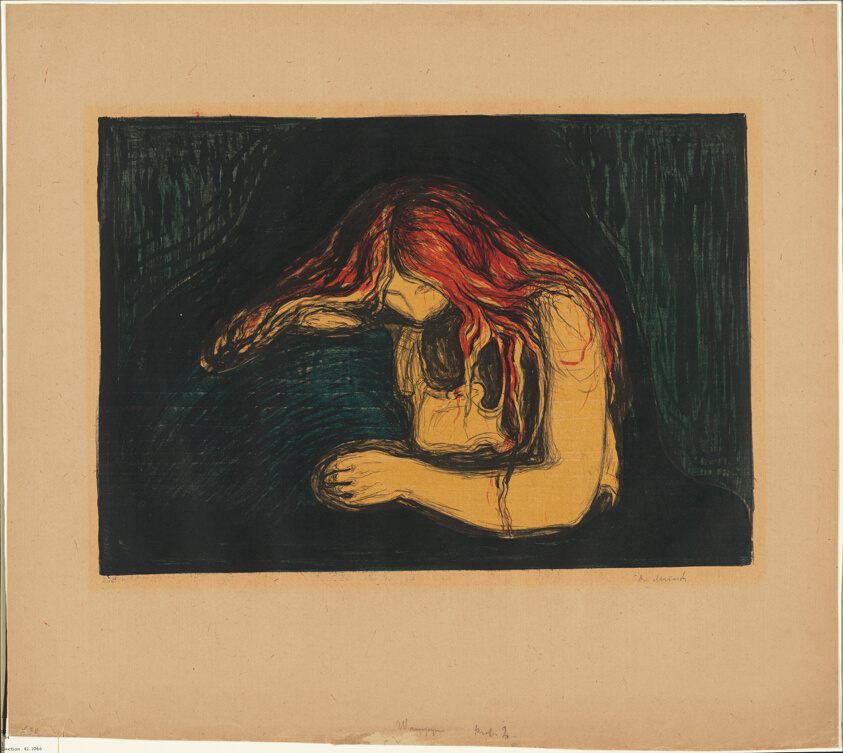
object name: Print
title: The Vampire II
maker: Edvard Munch (Norwegian, 1863-1944)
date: 1895/1902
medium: Color lithograph and woodcut on tan wove paper with fibrous inclusions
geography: Norway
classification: lithograph; print; prints and drawing